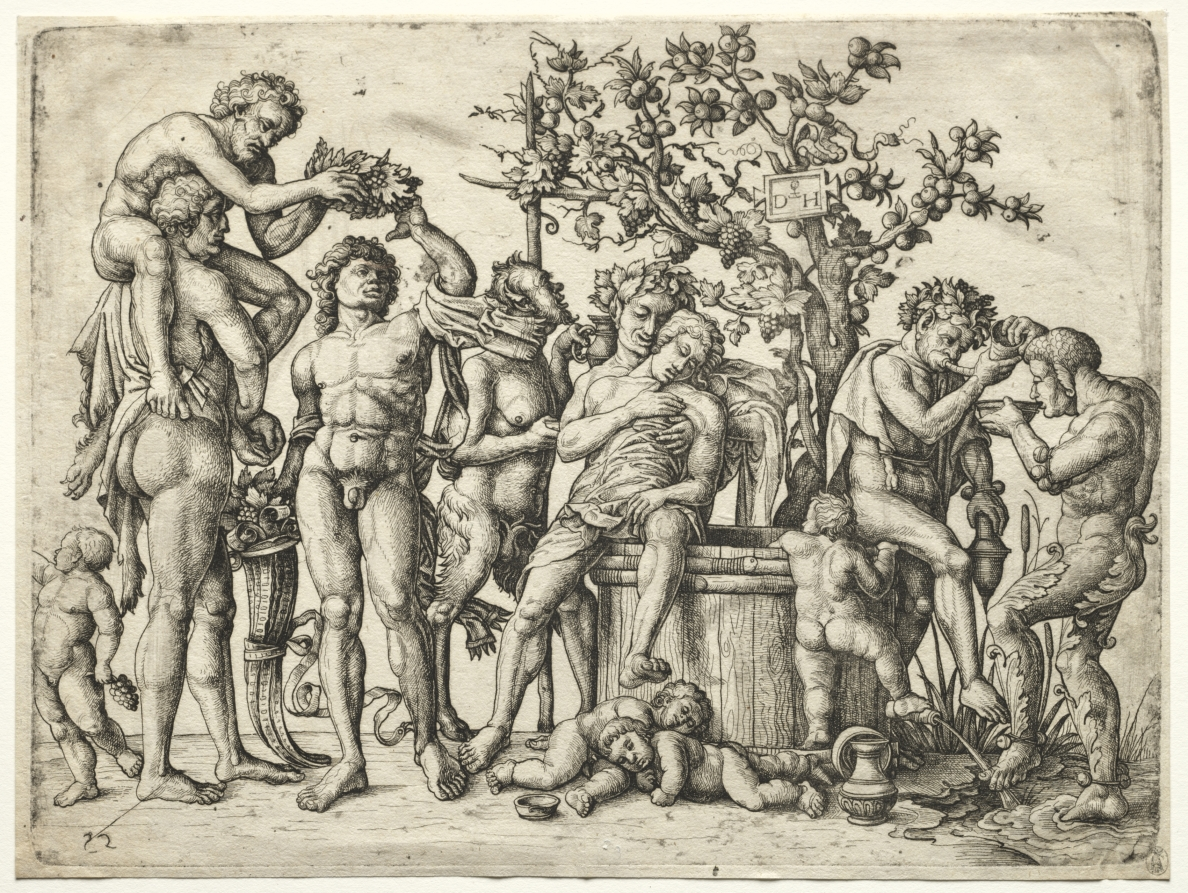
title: The Bacchanal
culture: Germany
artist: Daniel Hopfer (German, c. 1470–1536)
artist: after Andrea Mantegna (Italian, about 1431–1506)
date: c.1490–1536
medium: etching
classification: Print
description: Andrea Mantegna was among the first artists in Italy to produce engravings. His scene of a bacchanalia, a wine-fueled festival of ancient Rome, is composed as if on a shallow stage, attesting to Mantegna’s interest in relief-carved Roman sarcophagi (stone coffins). Standing with his horn of plenty, Bacchus is in control of his senses. The mortals around him falter from too much drink. When Mantegna began making engravings in the 1470s, he was among the first to use the technique to reproduce drawings. Many of Mantegna’s engravings show printing imperfections, the result of a shallowly carved printing plate and ink that did not adhere evenly to the paper. The later copy looks quite different. Daniel Hopfer employed the nimbler technique of etching and had access to higher-quality inks and papers.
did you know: The ancient Greek philosopher Plato, who was still widely read in the sixteenth century, wrote that wine could enhance creativity and even unlock divine ecstasy.